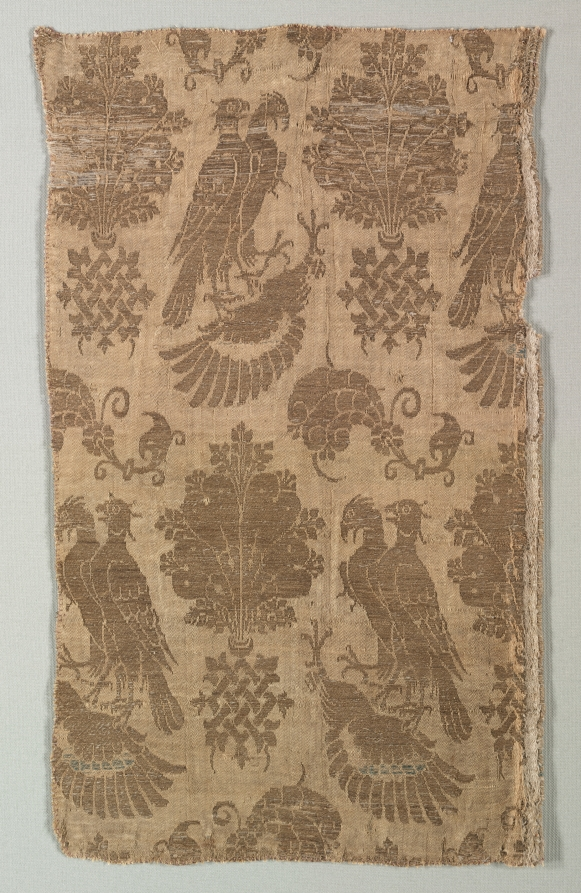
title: Gold-patterned Silk with Falcons and Heraldry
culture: Italy, last third of 14th century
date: 1360–1400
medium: Silk, gold thread; a combination of two weaves (lampas)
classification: Textile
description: Instead of international designs, this splendid gold-thread patterned silk displays a mixture of heraldic and falconry emblems. Pairs of falcons stand on a main d’aigle, a heraldic charge consisting of a bird’s wing and claw. They alternate with a panache, or plumes, from an ostrich with an ornamental interlacement at its base. Traditionally panaches were helmet or hat ornaments, but here is a heraldic crest. Although European motifs form the pattern, the dramatic energy of asymmetrical Chinese design persists.